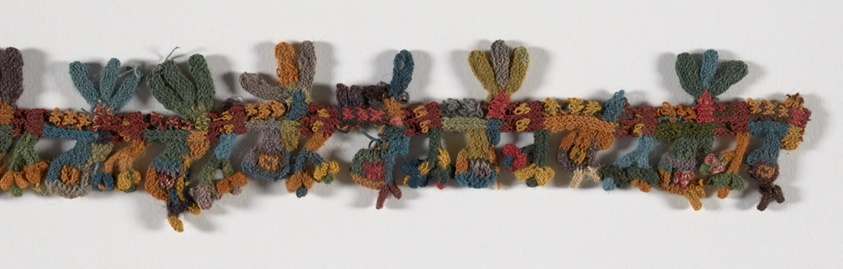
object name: Textile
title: Border Fragment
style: nazca, andean, andes, Pre-Columbian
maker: Nazca; South coast, Peru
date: 100 B.C./A.D. 200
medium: Wool (camelid), tubular cross-knit looping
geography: Peru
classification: textile; weaving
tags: super/natural